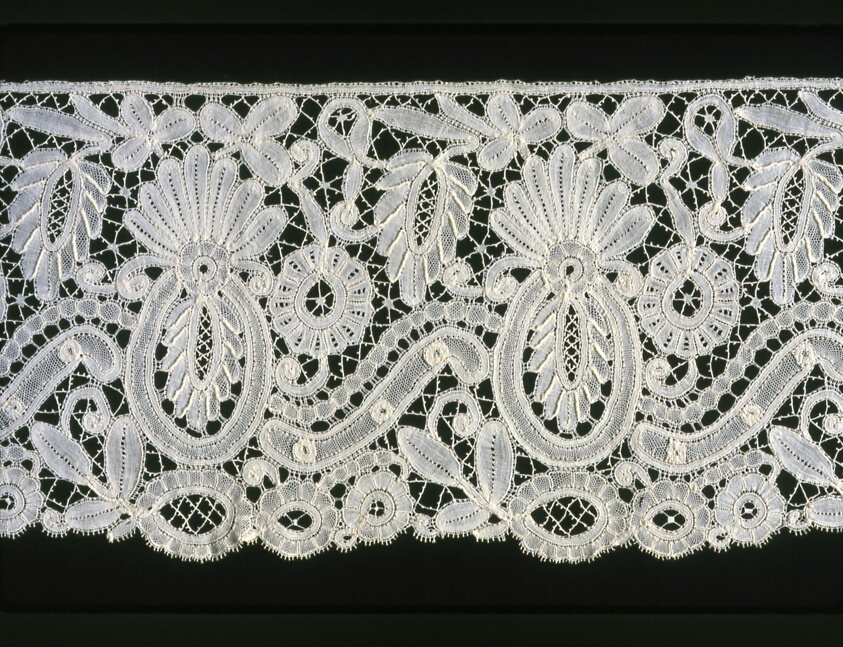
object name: Costume and Accessories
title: Flounce (Fragment)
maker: Belgium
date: 1860s/80s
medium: Cotton, bobbin part lace of a type known as "Duchesse de Bruges"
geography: Belgium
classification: costume accessory; lace - bobbin; textile; costume; costume accessory - headdress; costume accessory worn above the waist